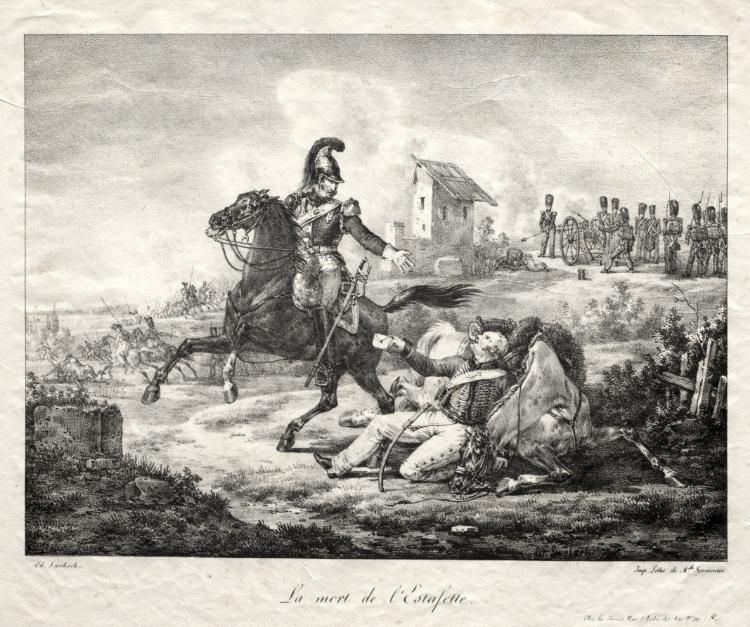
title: The Death of the Courier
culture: France, 19th century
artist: Edouard Swebach (French, 1800–1870)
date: 1800s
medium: lithograph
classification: Print